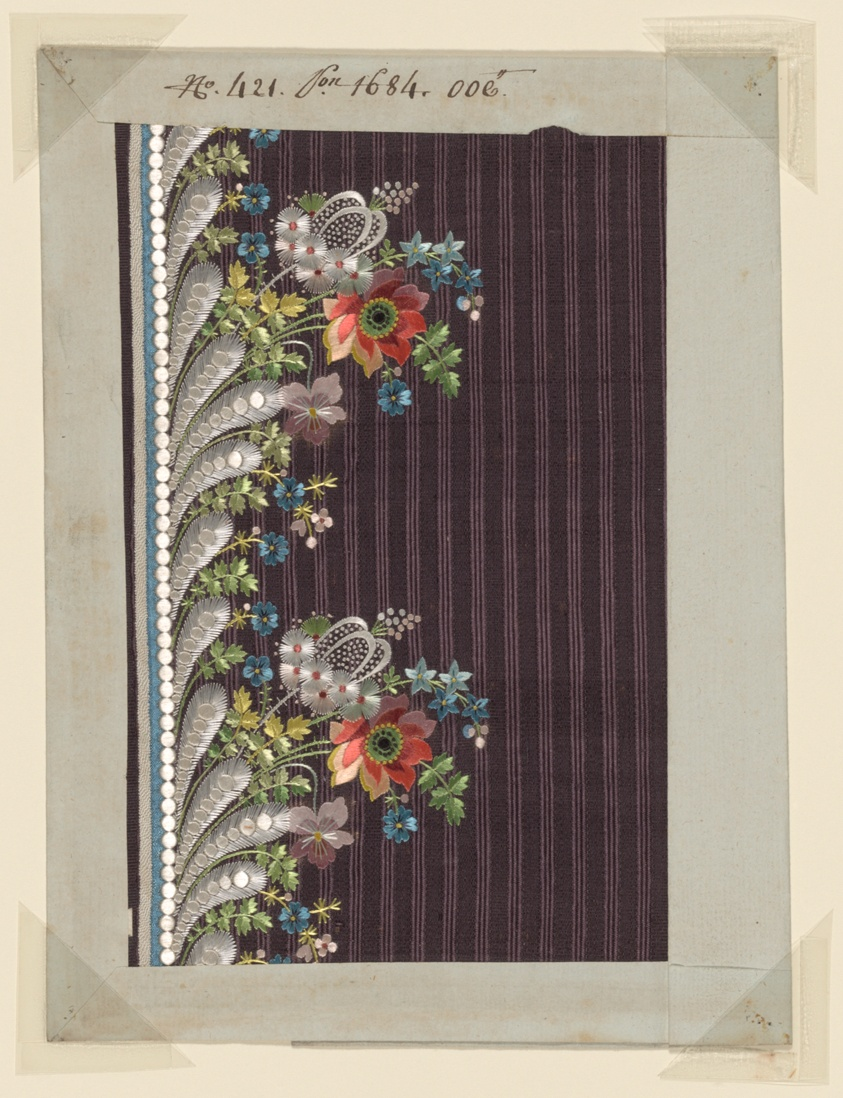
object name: Textile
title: Salesman's Sample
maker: Probably France, Lyon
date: 1780-1810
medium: Silk, plain weave with supplementary patterning warps and supplementary patterning wefts; appliquéd with silk, plain weave; embroidered with silk floss and yarns in outline, satin, padded satin, single satin and stem stitches; French knots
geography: France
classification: textile; needlework (visual works); costume; costume - embroidery; embroidery; needlework - costume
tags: flowers, floral motifs